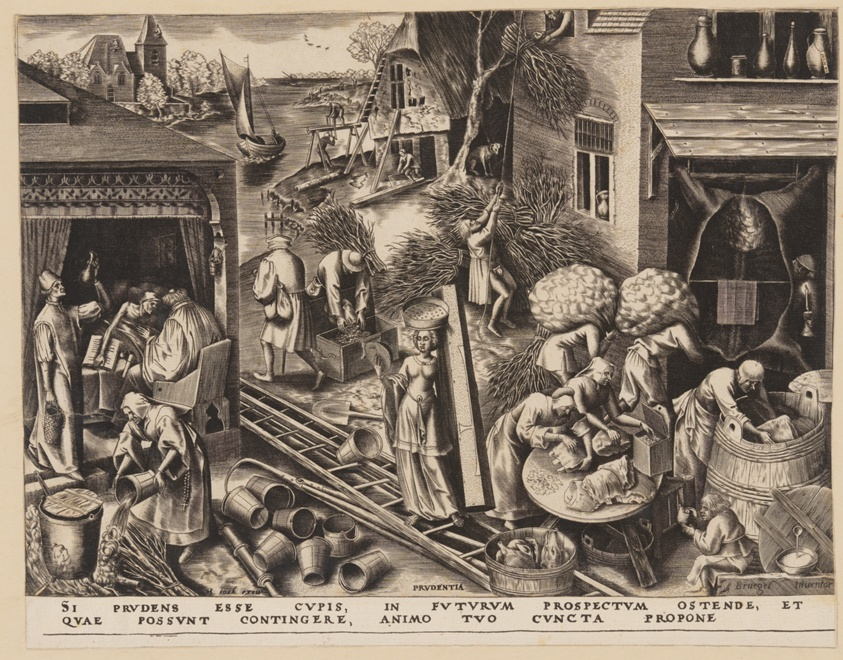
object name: Print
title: Prudence, from The Seven Virtues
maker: Philip Galle (Flemish, 1537–1612); after Pieter Bruegel, the elder (Flemish, c. 1525–1569); published by Hieronymus Cock (Netherlandish, c. 1510–1570)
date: 1559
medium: Engraving on ivory laid paper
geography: Flanders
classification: engraving; paper; print; prints and drawing